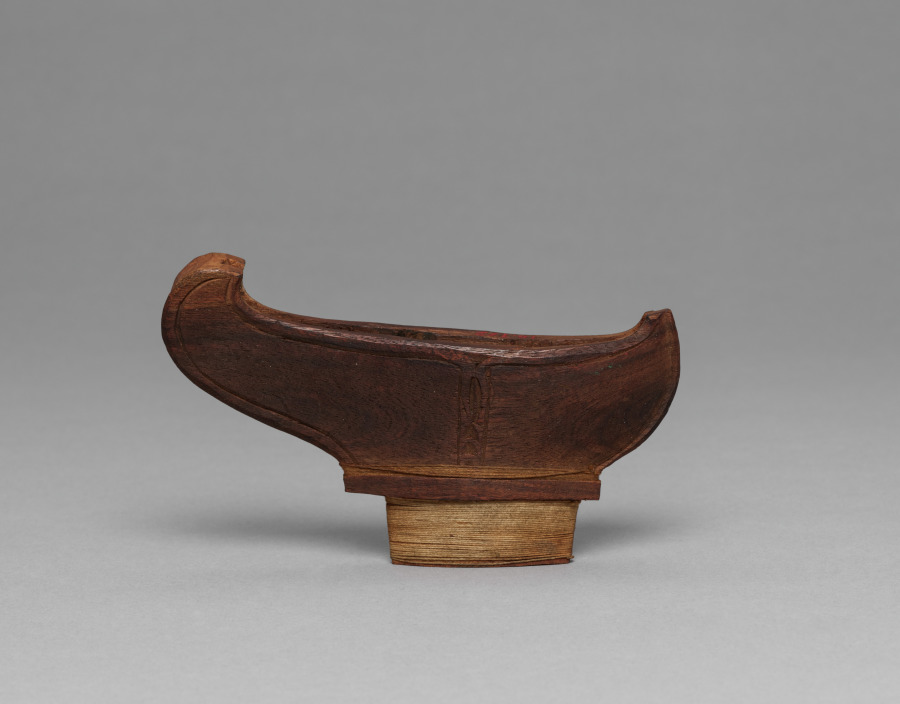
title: Scabbard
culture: Philippines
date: before 1916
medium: Wood with thread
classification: Arms and Armor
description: This is the upper section of a kalis scabbard, carved from a single block of hardwood. The carved walls follow the classic okir-inflected contouring, though the decoration is restrained. A single vertical motif—likely a simplified dapun (leaf) element—is incised along the center line, with the rest of the surface left plain.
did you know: The scabbard’s minimalism suggests either an earlier form or a piece intended for practical use.